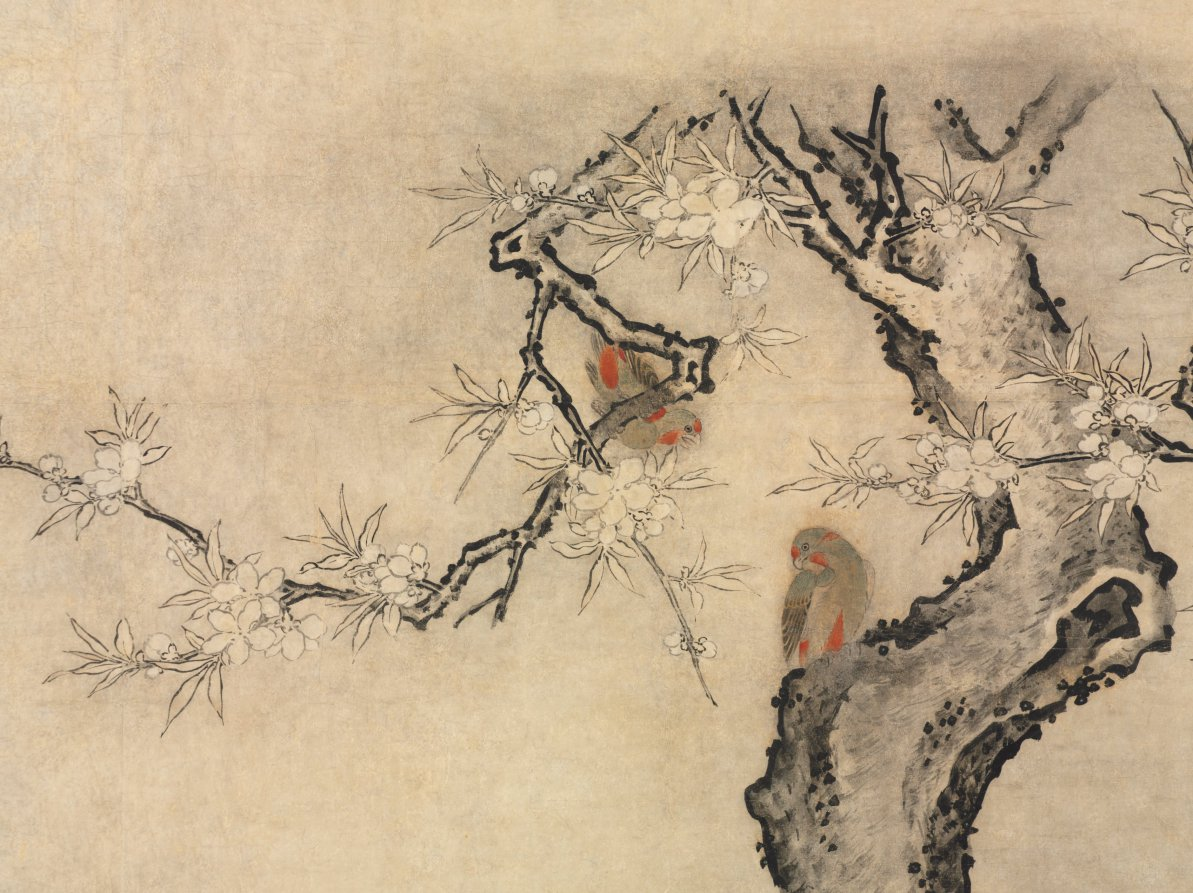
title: Flowers and Birds in a Spring Landscape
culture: Japan, Muromachi period (1392–1573)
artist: attributed to Kano Motonobu (Japanese, c. 1476–1559)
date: 1500s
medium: One of a set of sliding door panels mounted as hanging scrolls; ink and color on paper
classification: Painting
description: These four paintings originally decorated sliding doors that partitioned the interiors of Japanese buildings. Painters from the Kano school, named after the artist Kano Motonobu (1476–1559), were major forces in the production of screens and architectural interiors in Kyoto. When he headed the workshop, his work was prized by the upper strata of society. Kano is credited with combining the subtlety of Chinese black ink painting, as seen in the rocks and hills, with the color and realism of Japanese painting, seen in the birds and flowers. Landscape scenes like this were prized by the elite of Kyoto, both for their contemplative aesthetic and their patrons’ refined taste.